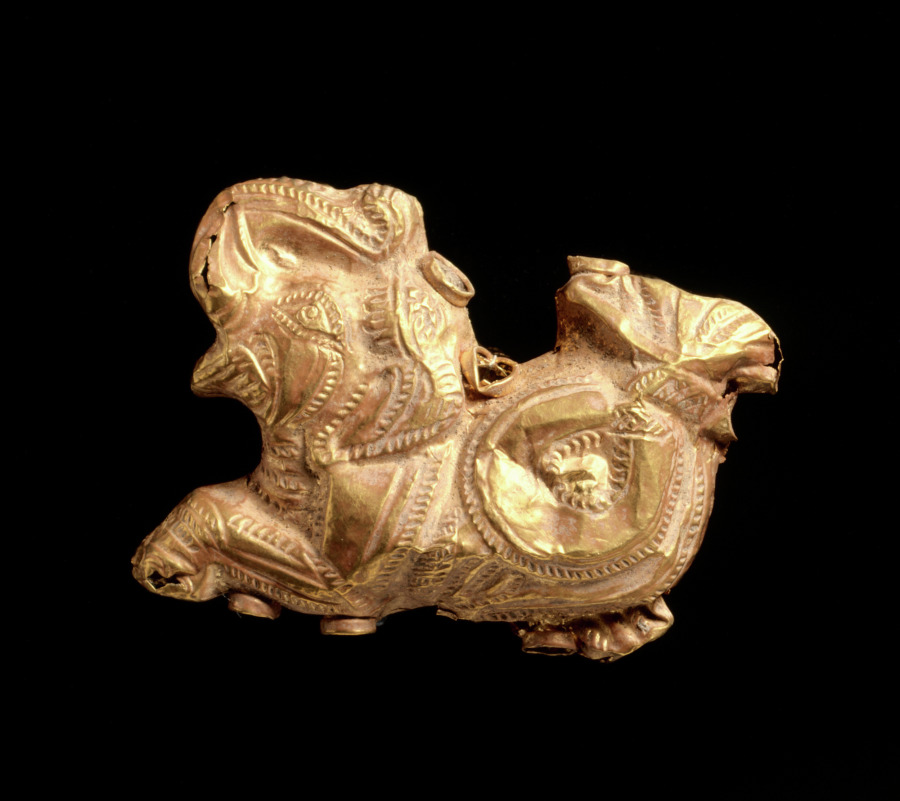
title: Pendant in the Shape of a Fish-Tailed Elephant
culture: India, Shunga period (185–78 BCE)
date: 185–72 BCE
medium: gold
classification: Jewelry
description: Because of water's life-giving properties, animals such as fish and Indian elephants who love the water were considered auspicious. This composite elephant with a playfully raised trunk and a curling fish tail would have been strung as a pendant on a necklace.